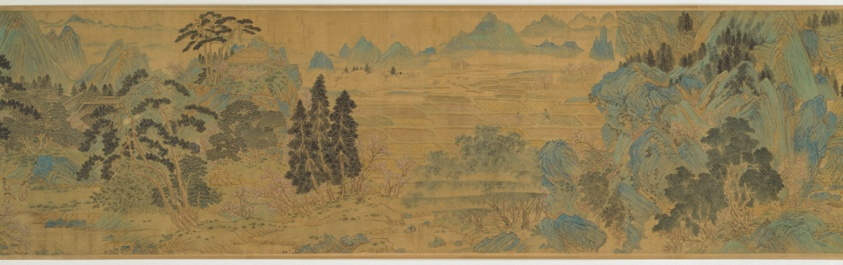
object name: Painting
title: The Peach Blossom Spring 桃花源圖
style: Chinese (culture or style)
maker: Artist unknown (17th century), spurious signature of Qiu Ying 仇英 (c. 1500-1552); Chinese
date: Late Ming (1368–1644) or early Qing (1644–1912) dynasty 明朝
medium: Handscroll; ink and color on silk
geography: China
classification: handscroll; painting; asian art